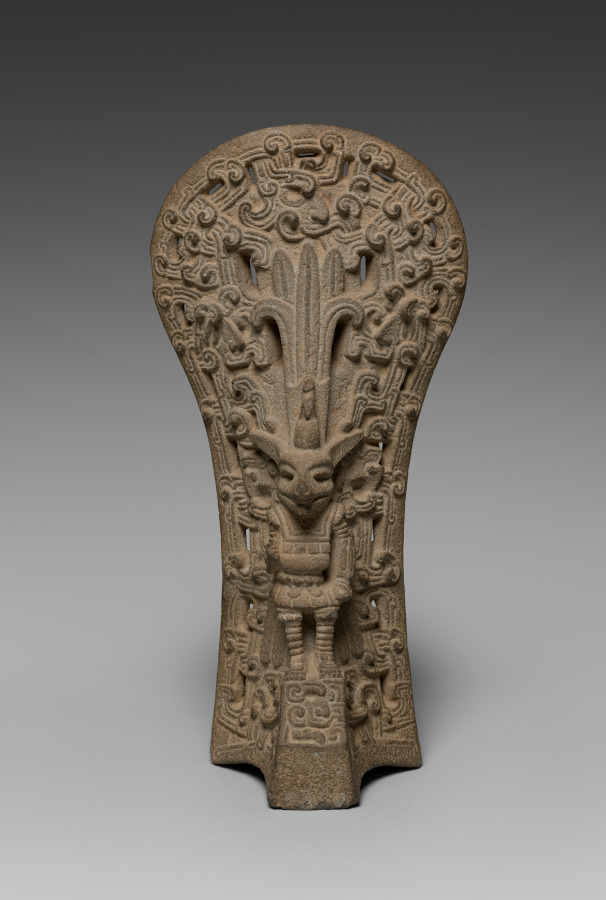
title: Ballgame Palma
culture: Mexico, Gulf Coast, Classic Veracruz style (600-1100)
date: c. 900–1100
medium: stone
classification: Sculpture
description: Stone palmas—so-called today for their palm frond-like shape—are ceremonial sculptures that may replicate lightweight gear worn over the chest during the ballgame. The scene on the back of this palma vividly illustrates the tie between the ballgame and sacrifice. A bat descends from the top, clutching severed human body parts, and at the center an upright figure brandishes a blade over a reclining victim. The scene's many animal figures, including the one on the front, may belong to ballgame mythology that now is lost.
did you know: The Mesoamerican ballgame was played with a hard rubber ball that players bounced off their hips.